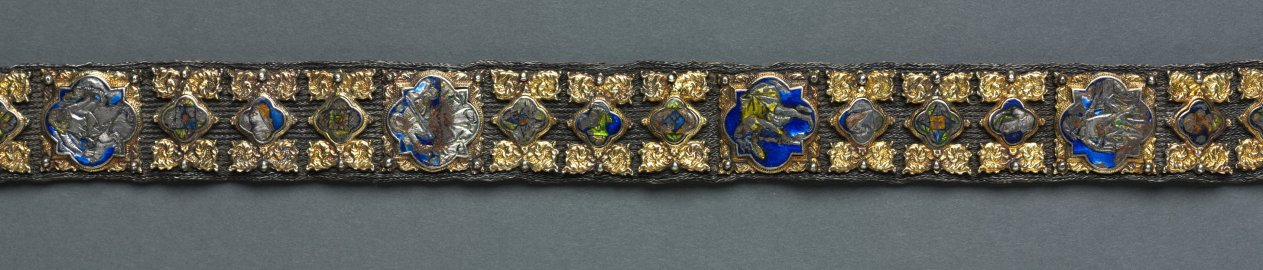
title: Belt for a Lady's Dress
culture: Italy, Siena(?)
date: c. 1375–1400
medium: basse-taille enamel and gilding on silver, silver thread, gilt-silver buckle, cast and chased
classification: Jewelry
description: Because of its extraordinary richness, this belt (also known as a girdle) was both an ornament for the body and an object of great personal luxury. Almost eight feet in length, belts like this were at the height of fashion for both men and women. After being passed around the waist and through the buckle, one end of the belt would fall to the hem of the garment. The belt's many colorful enamel plaques are worked in translucent enamel over decoration engraved into the silver beneath (an enameler's technique known as basse-taille). Within the plaques and cast into the buckle are scenes of courtly love, musicians, and fantastic animals. A large number of translucent enamels were made for secular objects during the late Middle Ages for use on jewelry, cups, garment clasps, and similar objects. This belt is a rare survival among these now scarce objects.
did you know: Look closely at the tiny scenes of courtly love on the plaques that adorn this belt. Given their size, these scenes were designed for the enjoyment of the woman who wore this belt over a sumptuous dress rather than an admirer from a distance.